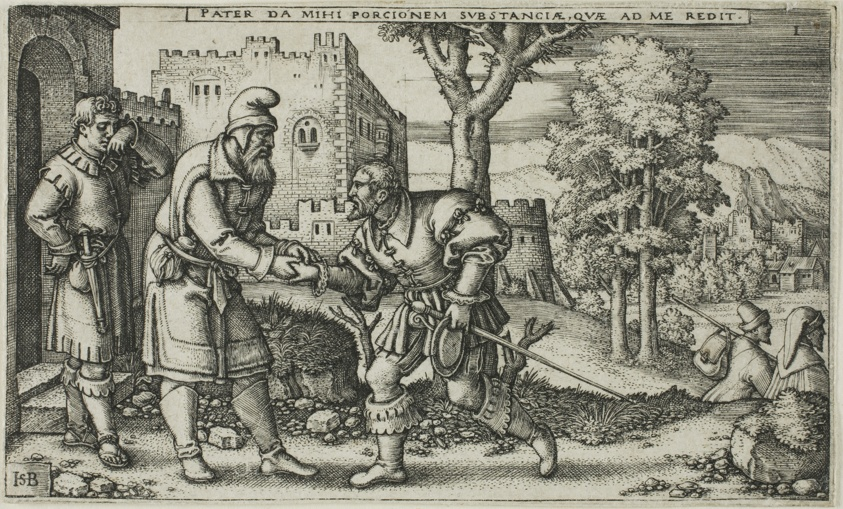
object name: Print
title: The Departure of the Prodigal Son, plate one from The History of the Prodigal Son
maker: Sebald Beham; German, 1500-1550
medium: Engraving in black on ivory laid paper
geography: Germany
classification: engraving; print; prints and drawing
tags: sons, fathers